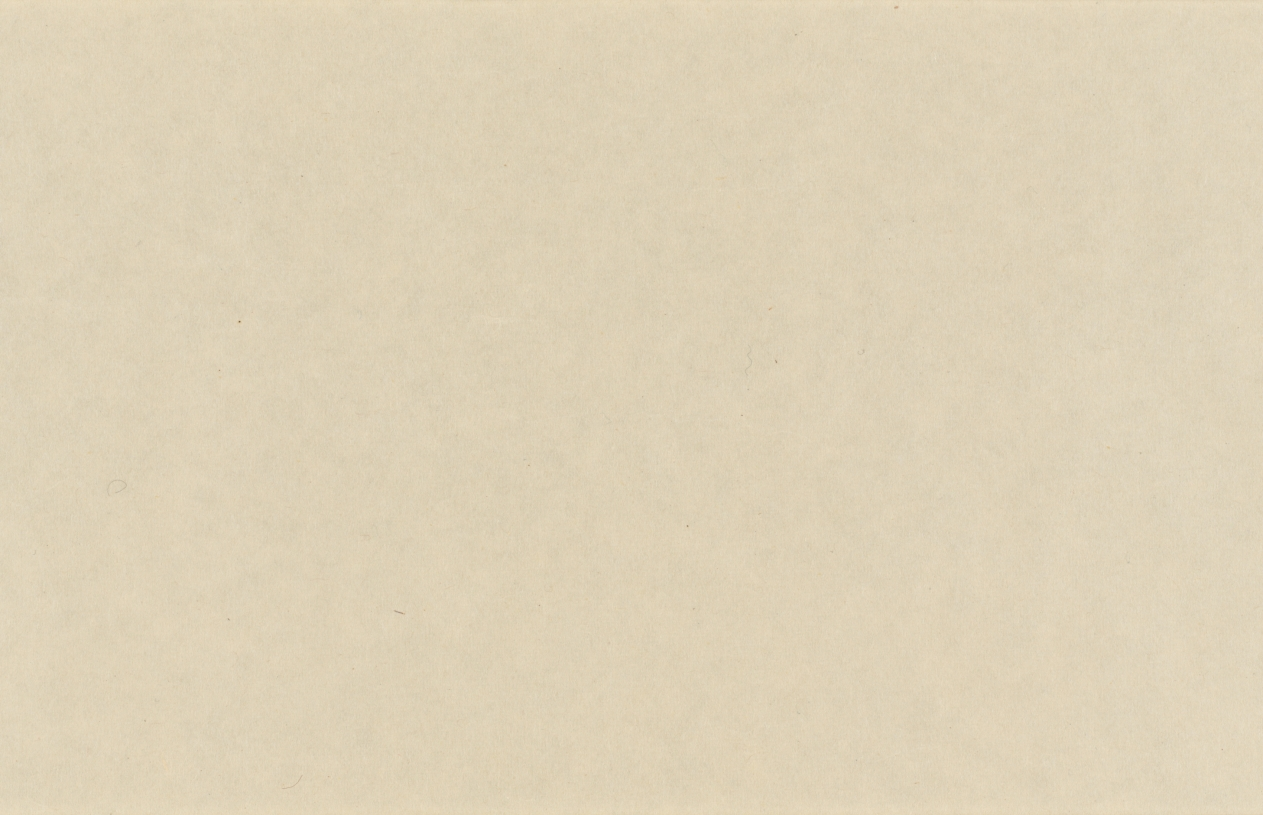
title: Eight Views of Xiao-Xiang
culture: Japan, Muromachi period (1392–1573)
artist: Sesson Shūkei (Japanese, c. 1492–c. 1577)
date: 1500s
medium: handscroll; ink on paper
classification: Painting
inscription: Signature and seal of artist at end of painting.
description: Eight Views of the Xiao and Xiang Rivers can be traced to 11th-century Chinese poems and paintings, the depiction of which had also become popular among Korean and Japanese painters. Xiao-Xiang refers to the region in present-day Hunan province where the Xiao and Xiang rivers converge. Few painters of the Eight Views had in fact seen the scenery; rather, they were trying to portray in ink and wash the lyrical qualities of dim light and a misty atmosphere typical of that region. Each of the poetic titles suggests a time of day, a season, or specific atmospheric conditions—subjects that challenged the abilities of the most talented artists. In this miniature painting (shukuzu) of the Muromachi period, Japanese Zen monk and painter Shukei Sesson depicted all eight views featured in Chinese prototypes: Wild Geese Descending to Sandbar; Returning Sails Off a Distant Coast; Mountain Market in Clearing Mist; River and Sky in Evening Snow; Autumn Moon over Dongting Lake; Night Rain on the Xiao and Xiang; Evening Bell from Mist-Shrouded Temple; and Fishing Village in Evening Glow.